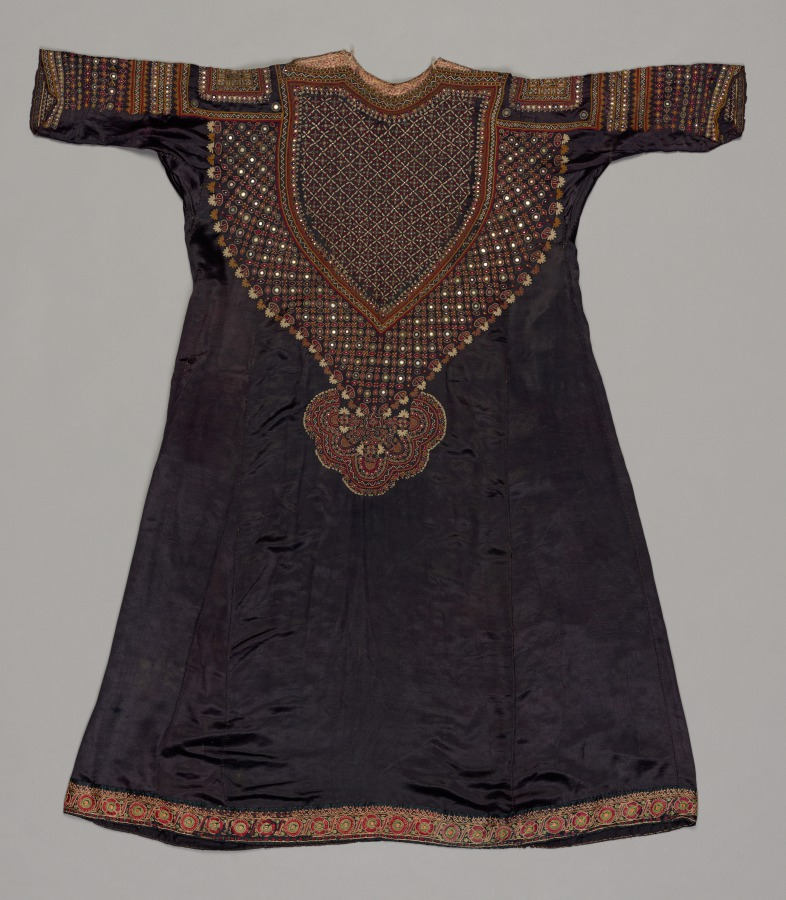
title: Dress (Choli)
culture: Western India, Gujarat, Kachchh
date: 1800s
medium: embroidery with mirror inserts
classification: Garment